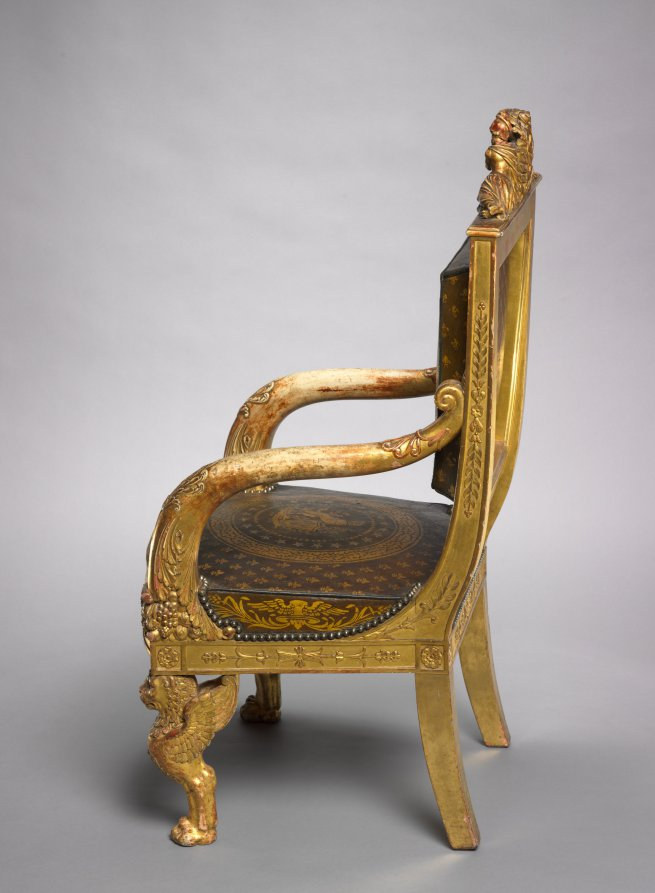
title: Child's Throne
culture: France, Paris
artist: Pierre-Marie Balny le Jeune (French, 1832)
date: 1822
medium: carved and gilded wood, leather upholstery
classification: Furniture and woodwork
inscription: inscribed with stencils inside back rail: BLONDEL TAPISSIER/RUE ST. ANTOINE N 72 1822 inscribed in ink lower edge back rail: 12 JANVIER 18[22?]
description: This chair was made for the young, presumed successor to the French throne who ruled briefly as Henri V in 1830, the last of the direct Bourbon line. He is depicted at the center of the top rail protected by female figures representing France and Minerva, the Roman goddess of wisdom. Fleurs-de-lis and the Gallic rooster, symbols of French royalty and the French people, decorate the upholstery.